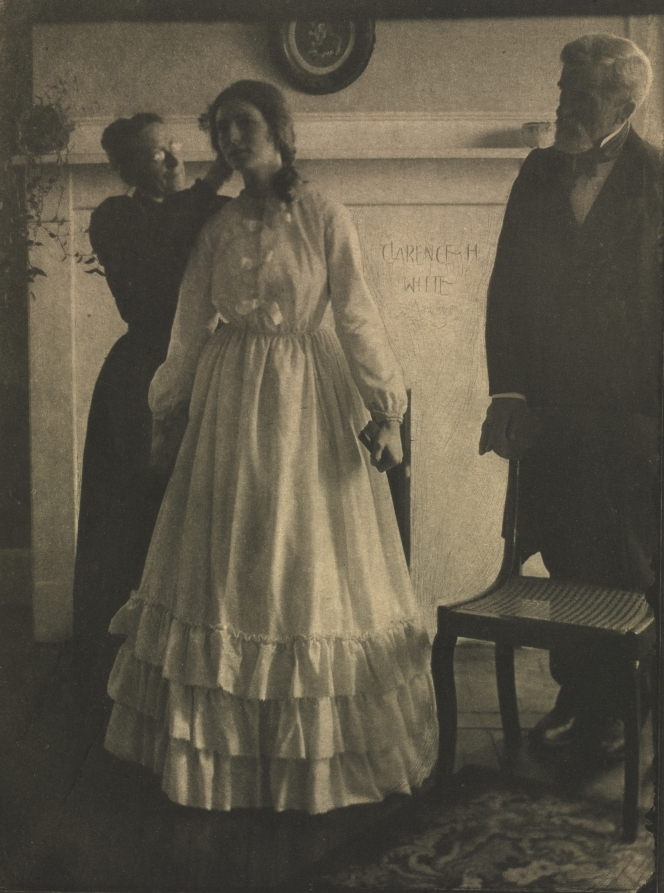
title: Camera Work: Illustration to "Beneath the Wrinkle"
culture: America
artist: Clarence H. White (American, 1871–1925)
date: 1905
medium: photogravure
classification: Bound Volume